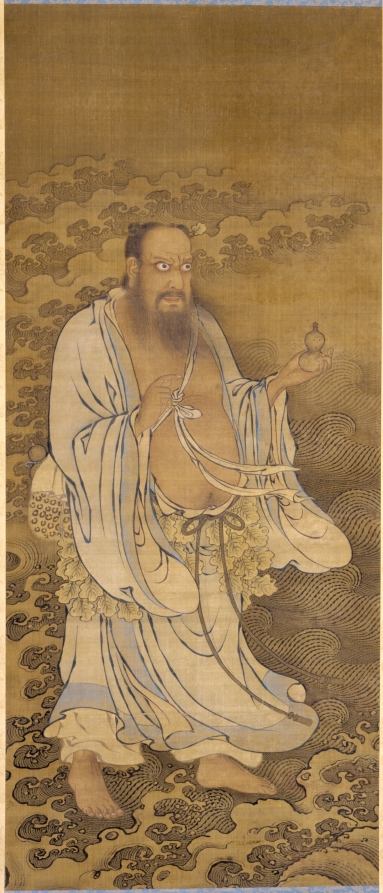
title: Zhongli Quan Crossing the Ocean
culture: China, Ming dynasty (1368–1644)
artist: Zhao Qi (Chinese, active early 1500s)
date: 1368–1644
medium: Hanging scroll; ink and color on silk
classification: Painting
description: Here, Zhongli Quan is crossing the ocean. He is one of the Eight Immortals (baxian), a group of popular Daoist figures who understood the way of life and could transform into otherworldly beings. Zhongli Quan is usually depicted as a scholar with a big belly seen through his partially open robe. The artist used expressive brushwork to depict the immortal’s fluttering robe and the roaring waves, skillfully creating a sense of movement. This scroll may have been one of a set depicting the Eight Immortals. Although the painting has no signature or seal, its style supports an attribution to the Ming dynasty painter Zhao Qi.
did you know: Zhongli Quan wears a girdle of leaves, a common Daoist immortal-recluse attribute.